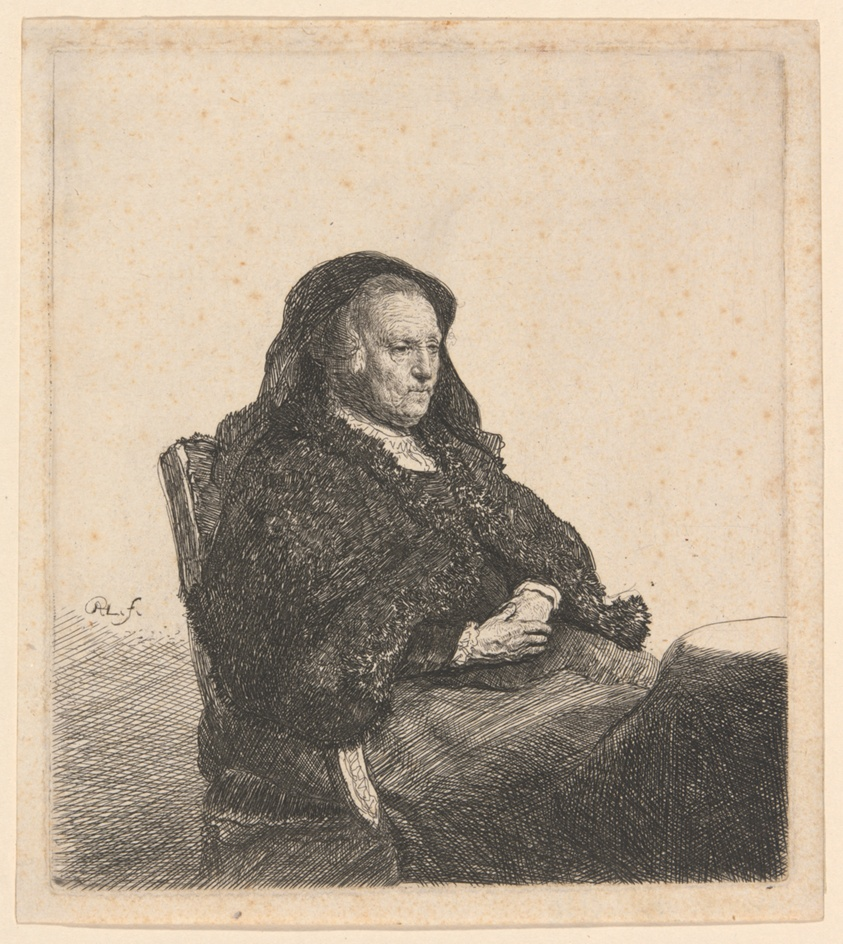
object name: Print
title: The Artist's Mother Seated at a Table, Looking Right: Three Quarter Length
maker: Rembrandt van Rijn (Dutch, 1606-1669)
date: c. 1631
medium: Etching on cream laid paper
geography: Holland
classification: etching; print; prints and drawing; paper